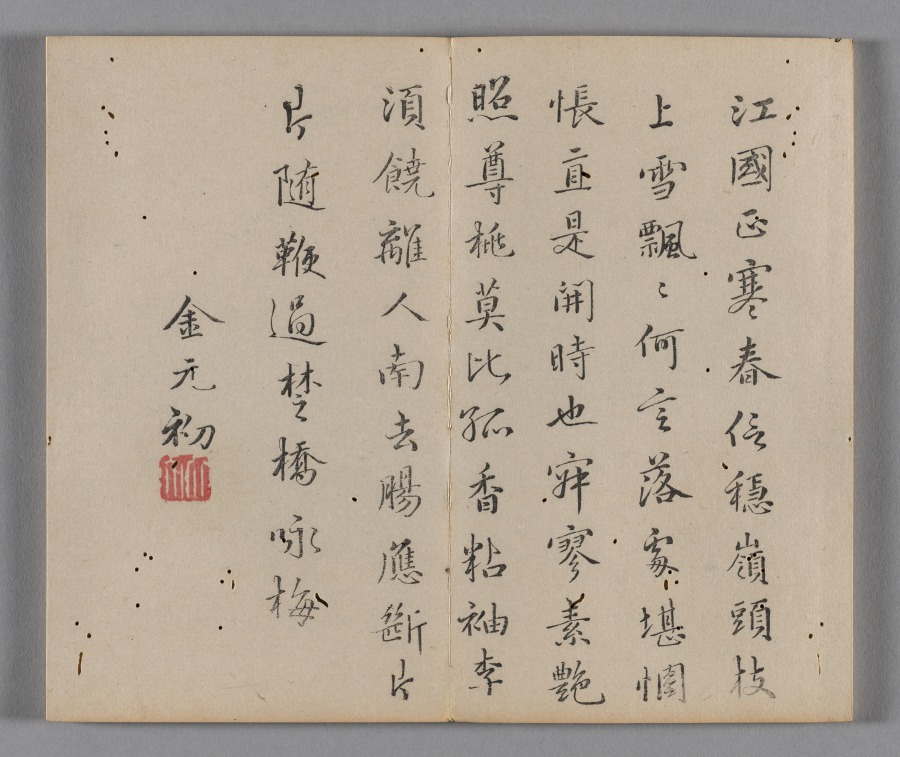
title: Ten Bamboo Studio Painting and Calligraphy Handbook (Shizhuzhai shuhua pu): Miscellaneous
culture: China, Qing dynasty (1644-1911)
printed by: Hu Zhengyan (Chinese, c. 1584–1674)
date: 1633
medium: Woodblock-printed book; ink and colors on paper; first edition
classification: Print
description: Color printing reached a level of perfection in the early 1600s, as seen in this Ten Bamboo Studio Collection of Calligraphy and Painting and the Mustard Seed Garden Manual of Painting (printed 1679 and 1701). The painterly quality, precision in registering (aligning) the woodblocks, and harmonious colors made them the most successful color print editions in Chinese history. Both editions were printed and compiled in Nanjing, spread nationwide, and had a great impact on the arts in Japan and Korea.